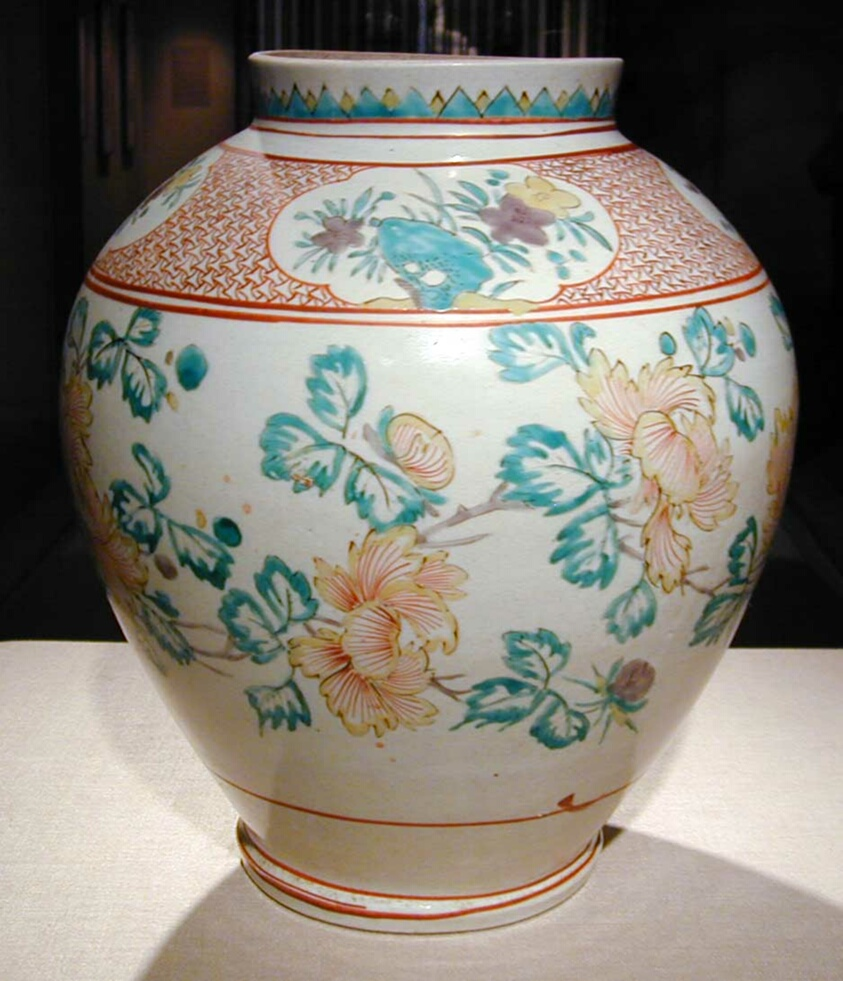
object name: Decorative Arts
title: Jar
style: Japanese (culture or style)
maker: Japanese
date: early Edo Period, early 17th century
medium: Arita ware, Kutani style; porcelain with polychrome enamel glaze decoration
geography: Japan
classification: porcelain; asian art; ceramics; decorative arts